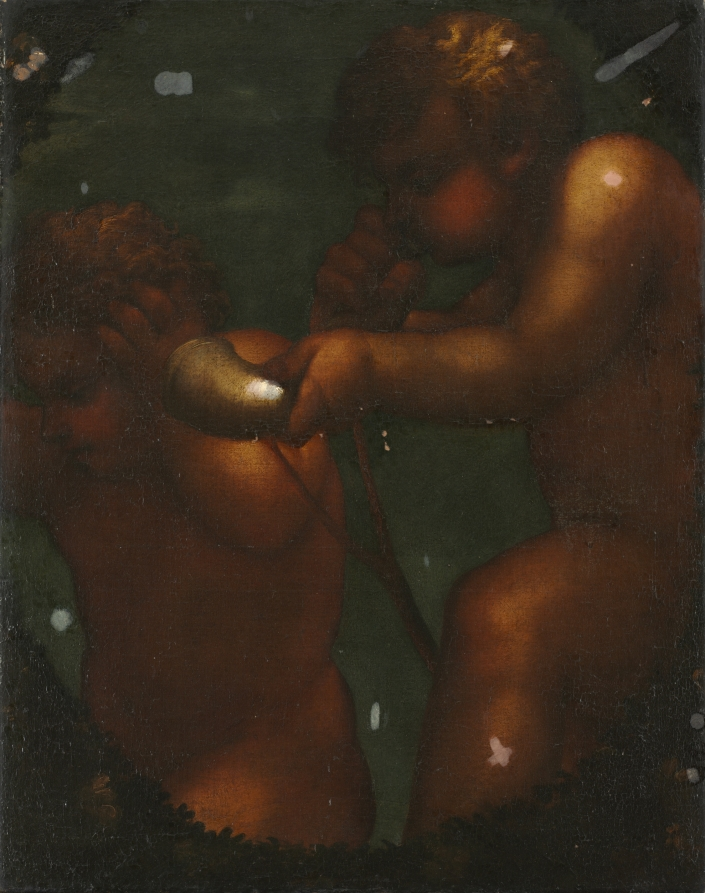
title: Two Putti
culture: Italy, 18th century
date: 1700s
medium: oil on canvas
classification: Painting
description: This painting depicts two playful putti, or cherub figures. One blows his horn into the other's ears; the other covers his ears to protect them. Now obscured by discolored varnish, the painting once had a greenish-blue background, now a mossy green. The pink flesh tones have turned bronze and the gray horn is now a brassy color. In 1519, Correggio painted playful putti in 16 oval ceiling frescoes in the Camera di San Paolo in Parma, Italy. These frescoes were commissioned by the Abbess Gioanna da Piacenza, as the room was her private quarters in the Benedictine nunnery of San Paolo. After the abbess's death, the house was strictly closed to the public for nearly two centuries. Thus Two Putti may be modeled after sketches of the frescoes made during the Abbess's lifetime, or, after the house reopened to the public, the artist may have admired the frescoes directly and modeled these putti after Correggio's originals.